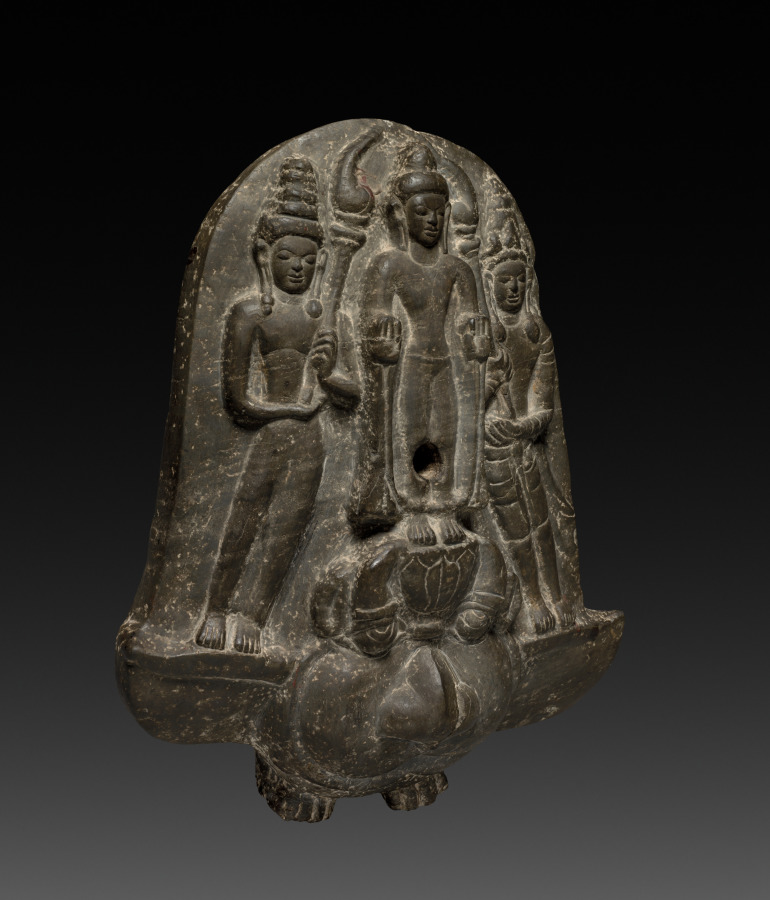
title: Bracket with Buddha and a Pair of Acolytes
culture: Thailand, Mon-Dvaravati style, probably from Nagara Pathama, 8th-9th Century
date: 700s–800s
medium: gray schist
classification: Sculpture